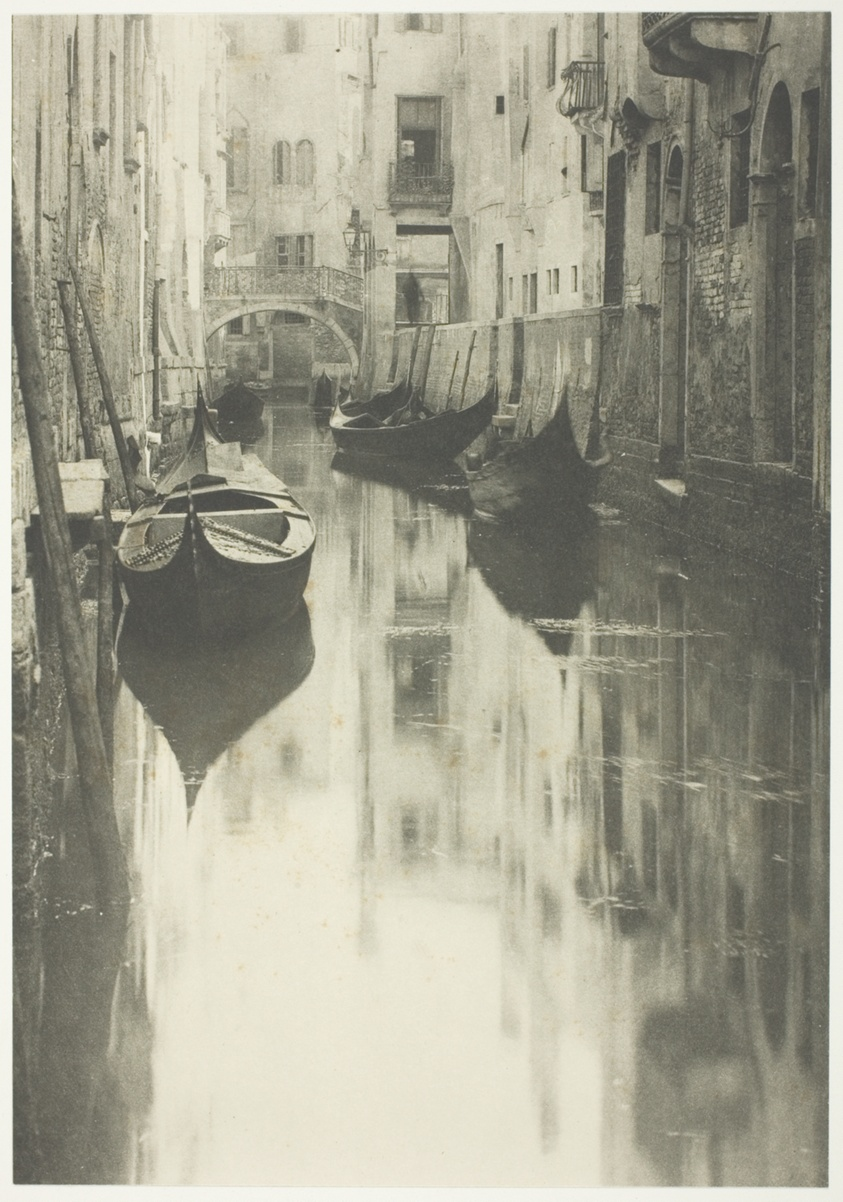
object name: Photograph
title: A Venetian Canal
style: Pictorialism, 19th century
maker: Alfred Stieglitz; American, 1864–1946; Publisher: R. H. Russell; American, Unknown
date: 1894, printed 1897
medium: Photogravure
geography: United States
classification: photogravure; photomechanical process; photography; photograph